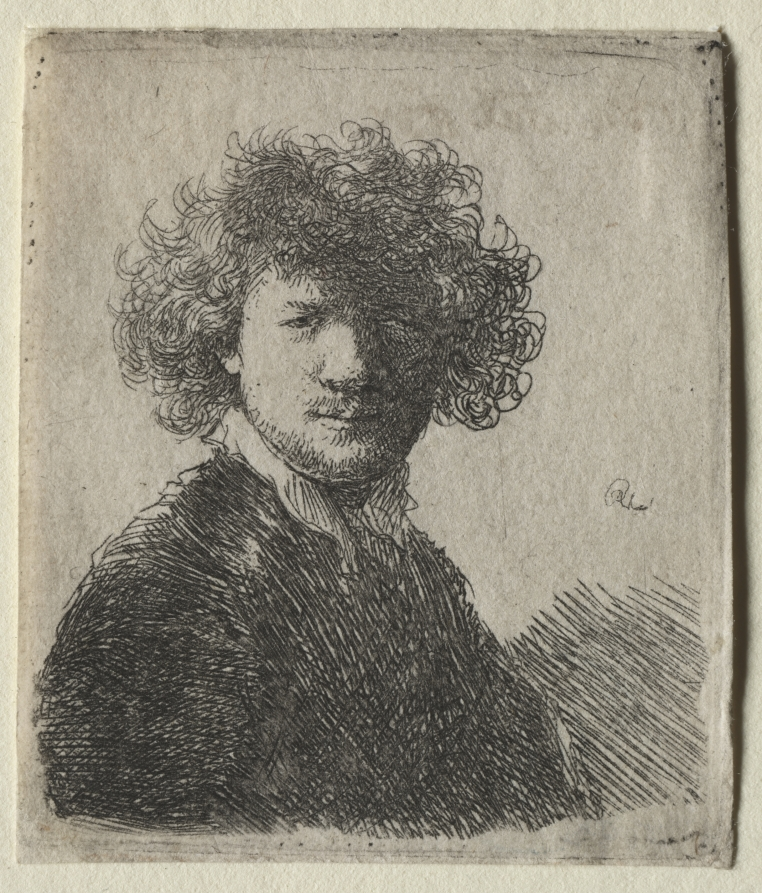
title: Self-Portrait with curly hair and white collar: Bust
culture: Netherlands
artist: Rembrandt van Rijn (Dutch, 1606–1669)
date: c. 1630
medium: etching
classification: Print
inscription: right center, in plate: RHL ; VERSO, upper left, in pen and brown ink: F. Gawet 837 ; upper left, in graphite: D. ld / a 230339 ; left center, in graphite: 209./vv/se. ; lower left, in graphite: EW.; lower left, in graphite: 170792 ; lower center, in graphite: B. 1 ; lower right, in graphite: 3[circled]